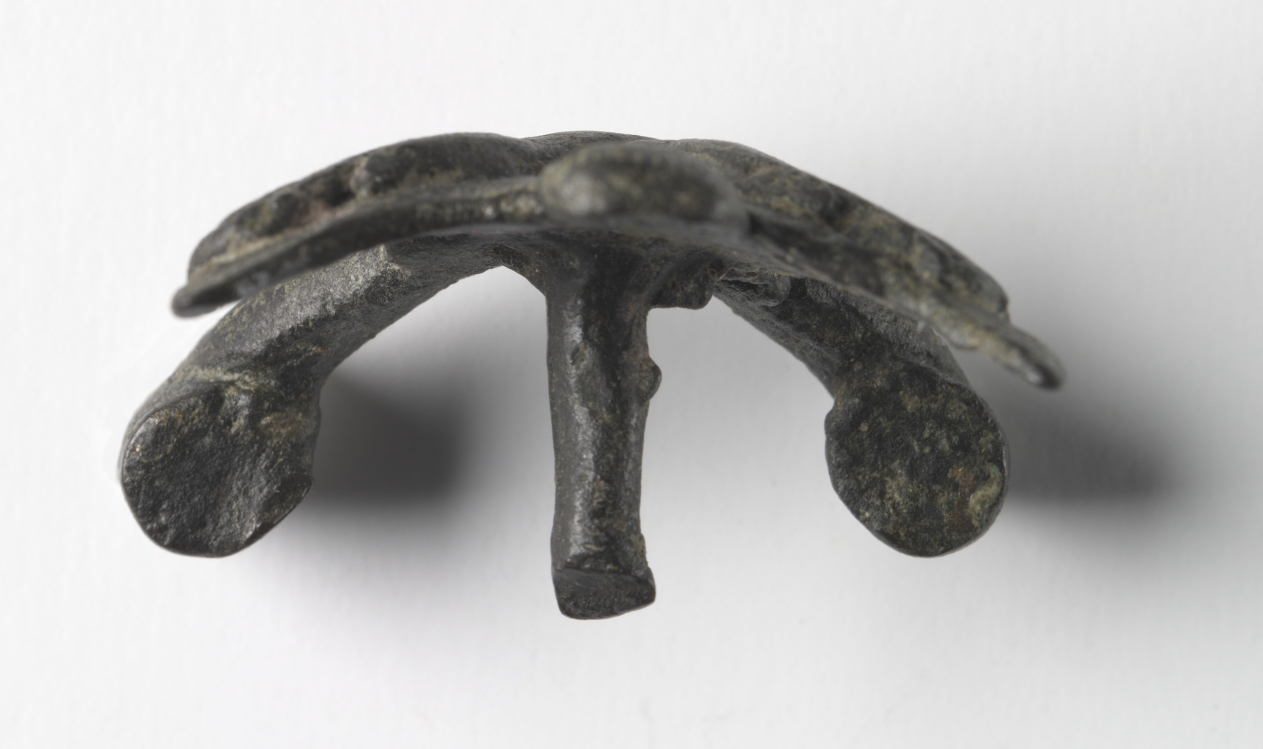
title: Bronze mount from a "Shawabty Bundle": Crossed Arms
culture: Egypt, Thebes, Wadi Qubbanet el-Qirud, New Kingdom (1540–1069 BCE), Dynasties 18–19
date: c. 1336–1256 BCE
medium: bronze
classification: Funerary Equipment